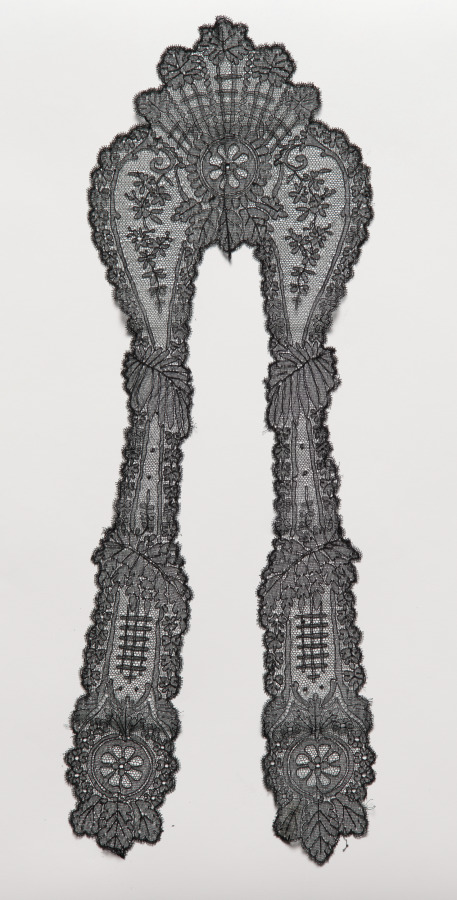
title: Lace Barb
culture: Spain, Ronda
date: 1860–99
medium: Cotton: machine lace (embroidered net)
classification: Lace